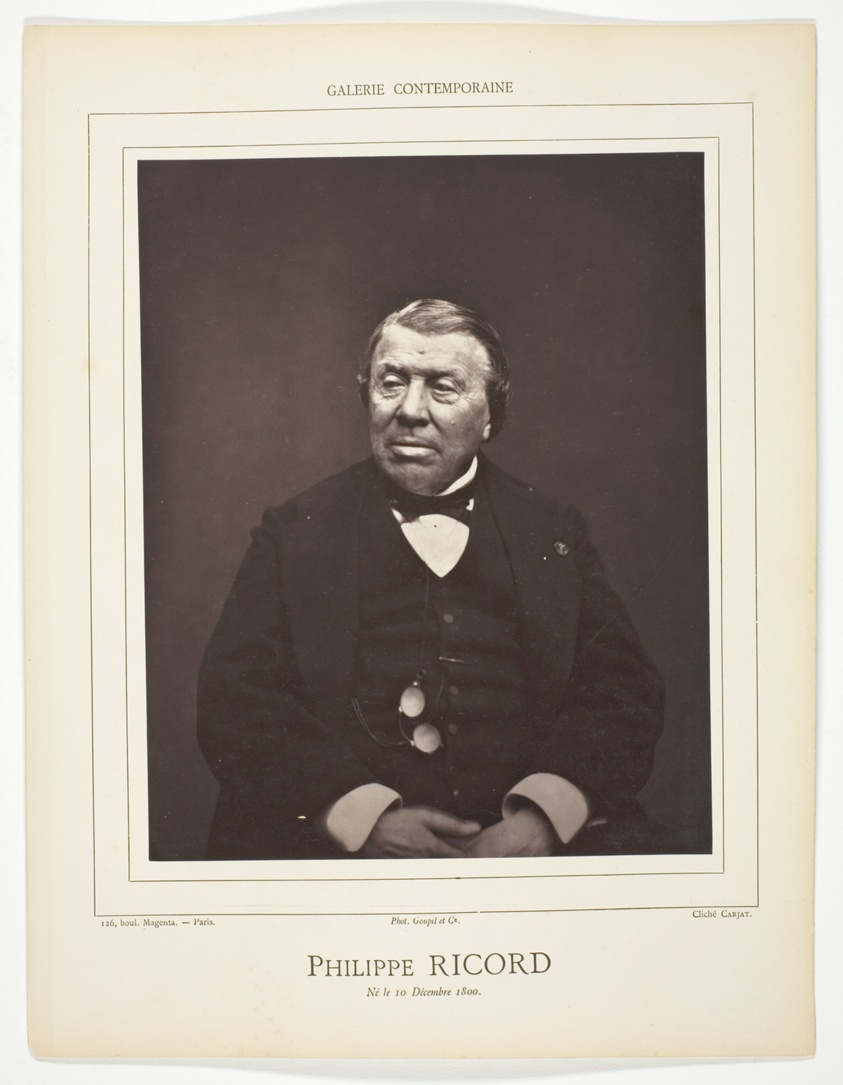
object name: Photograph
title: Philippe Ricord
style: 19th century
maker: Etienne Carjat (French, 1828–1906)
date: c. 1876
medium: Woodburytype, from the periodical “Galerie Contemporaine Littéraire, Artistique” (1877), volume 4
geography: France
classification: woodburytype; photomechanical process; photography; photograph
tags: Collected by Hugh Edwards, Contemporaine Littéraire